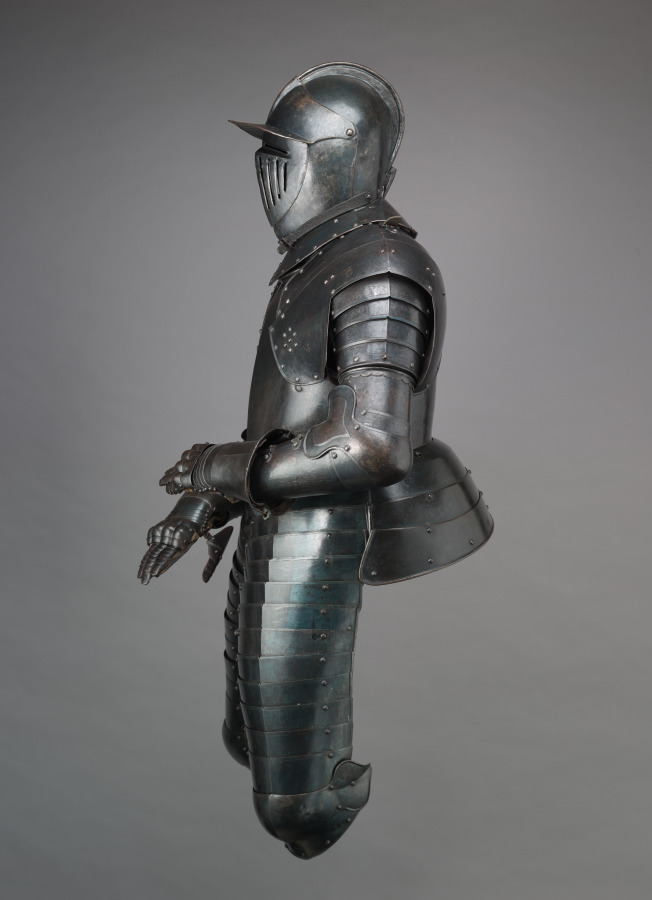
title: Cuirassier's Armor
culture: Austria, Graz(?), early 17th century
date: c. 1600–20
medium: steel (originally blued, now black); leather straps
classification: Arms and Armor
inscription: Proof mark (musket shot) is located on the proper left side of the breastplate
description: The cuirassier was the heavy cavalryman of the late 1500s and early 1600s. Carrying pistols and a sword, he was clad in full armor, like this suit, with the exception of his lower legs, which were protected by heavy riding boots. Shortly after 1650, such heavy cavalry armor disappeared from use. By then, European cavalries had abandoned full armor as impractical against the increased sophistication of firearms. Similar armors survive in the Armory of Graz, Austria.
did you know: This suit of armor is just over 5 1/2 feet tall.